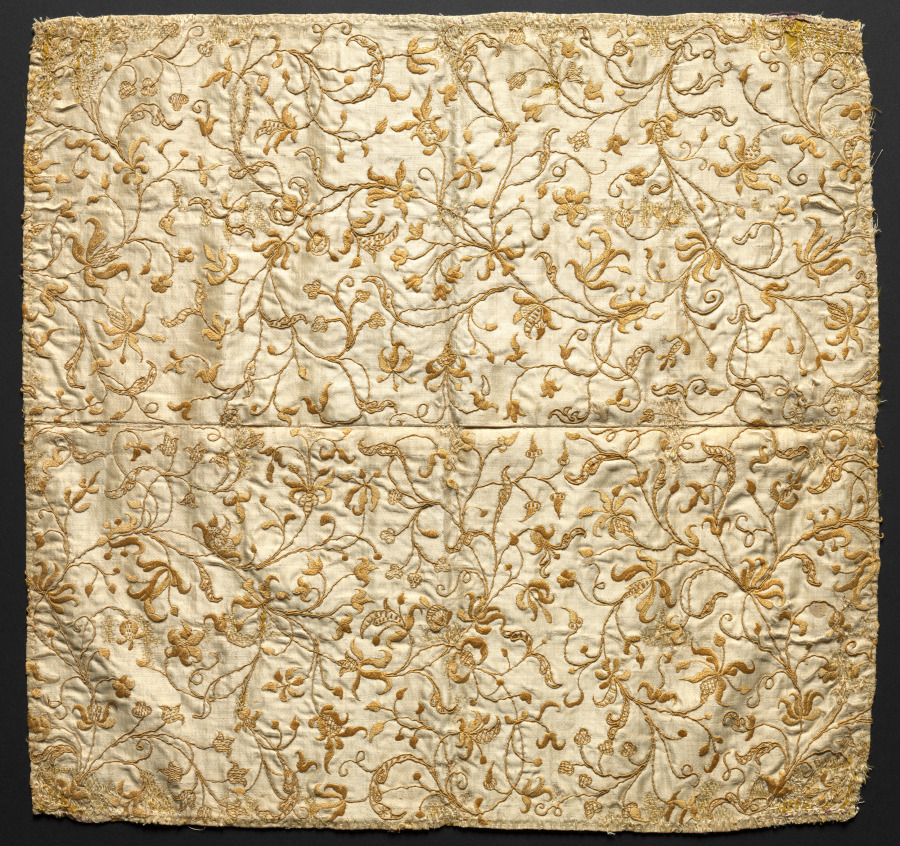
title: Embroidered Square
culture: Italy, 17th-18th century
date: 1600s-1700s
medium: embroidery, silk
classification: Embroidery